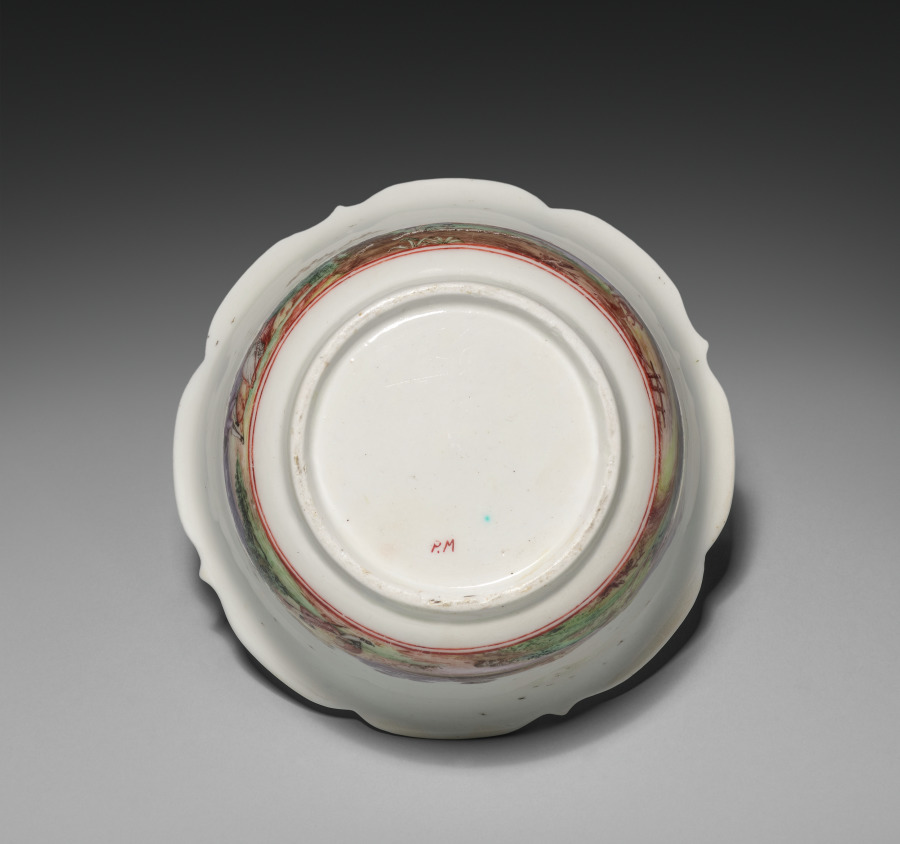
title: Sugar Bowl (Sucrier)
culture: France, Vincennes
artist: Sèvres Porcelain Factory (French, est. 1756)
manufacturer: Vincennes Porcelain Factory (France, 1740–56)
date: 1745–48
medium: soft-paste porcelain with enamel decoration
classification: Ceramic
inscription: in red: P.M.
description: This covered bowl is one of the earliest surviving examples of Vincennes porcelain. Its decorations, particularly the lacy borders, show the influence of Meissen porcelain, but an individual note is struck in the extreme delicacy and colorful restraint of the painting of the landscape scenes.